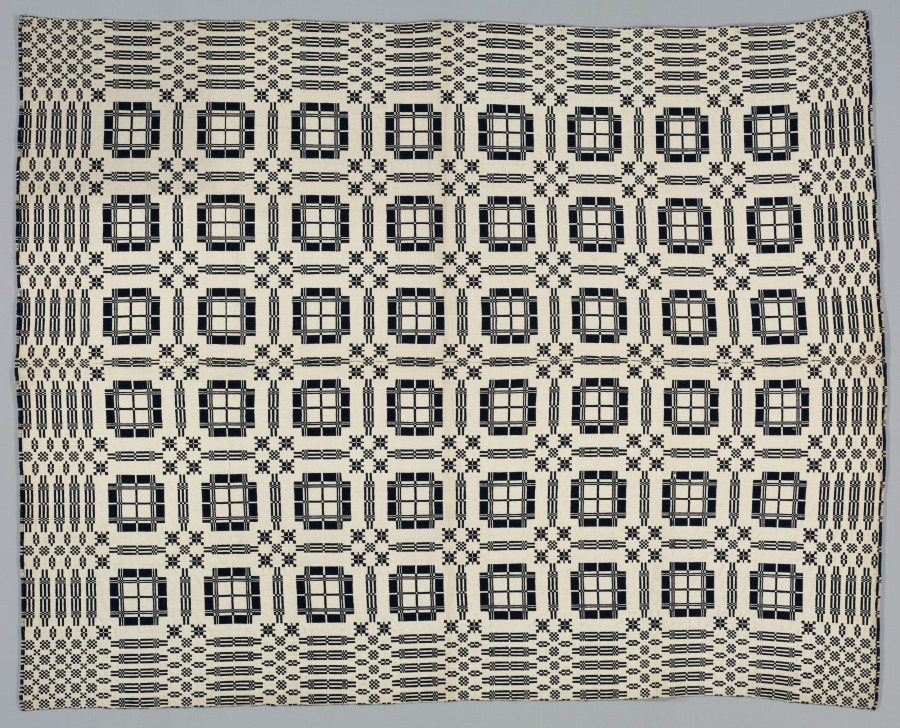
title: Coverlet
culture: America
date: 19th century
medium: wool and cotton; double cloth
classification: Textile